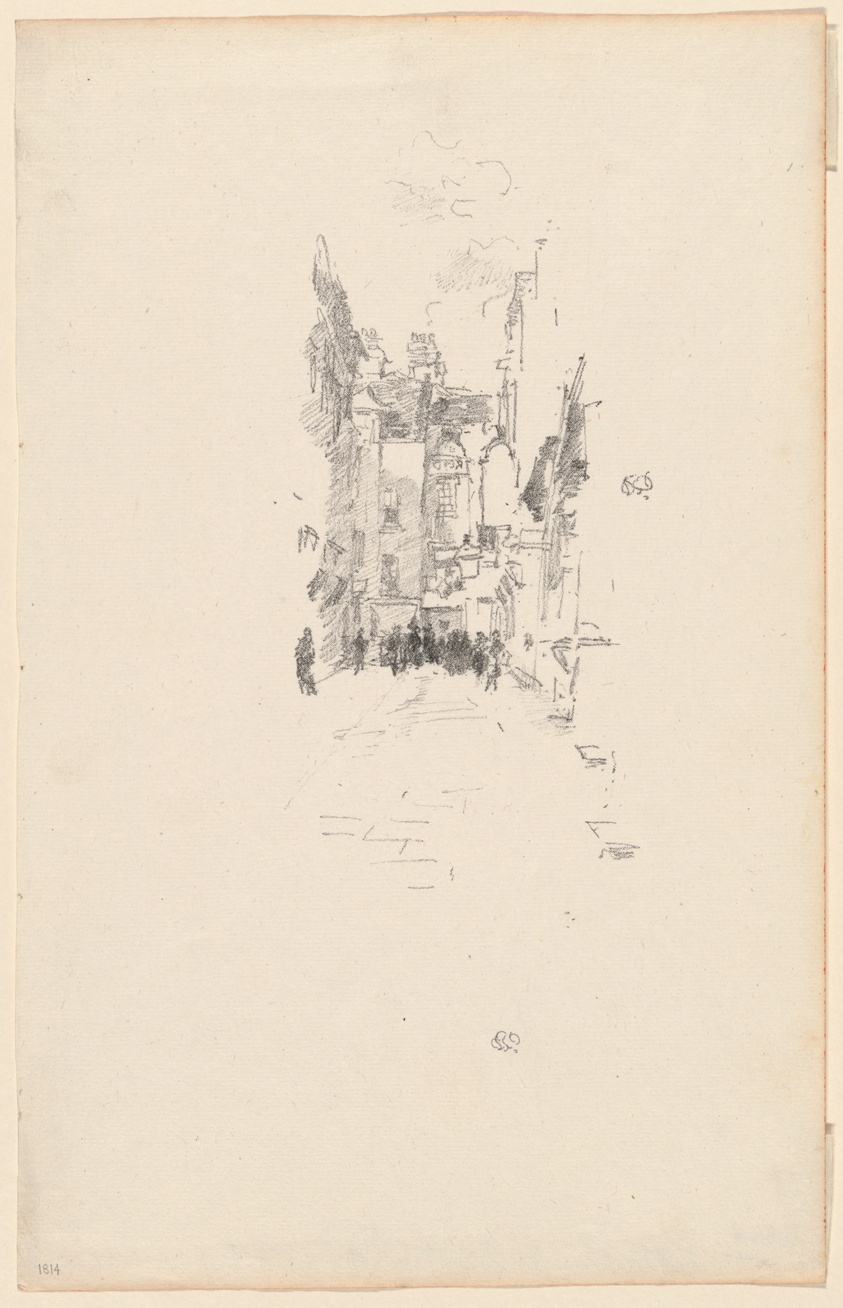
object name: Print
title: Little Court, Cloth Fair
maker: James McNeill Whistler (American, 1834-1903)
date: 1887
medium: Transfer lithograph in black on ivory laid paper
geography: United States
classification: transfer lithograph; lithograph; print; prints and drawing; paper